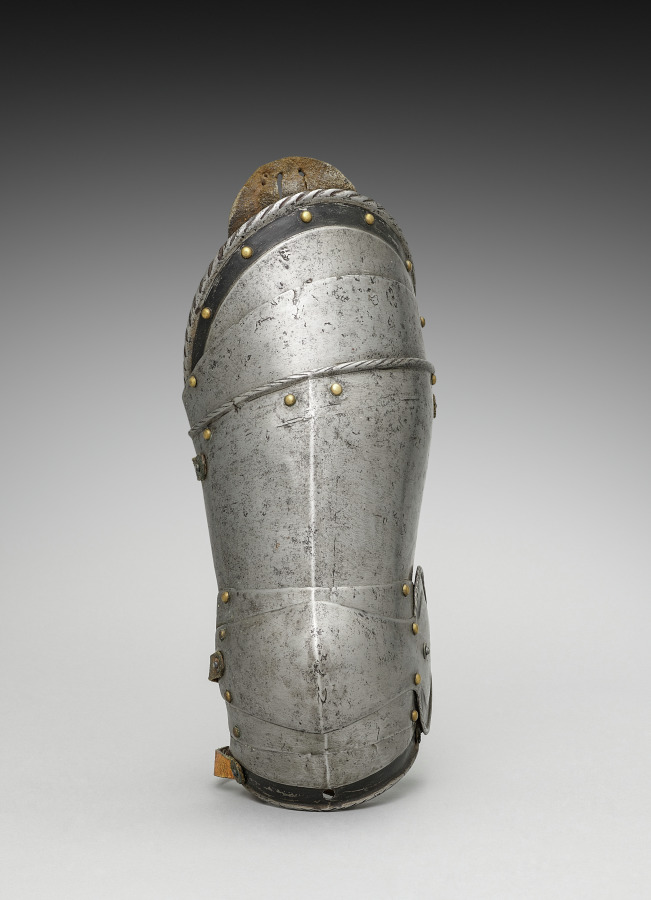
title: Left Cuisse with Poleyns (knee-cops)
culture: Germany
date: c.1550–1570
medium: iron, steel, leather and brass rivets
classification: Arms and Armor